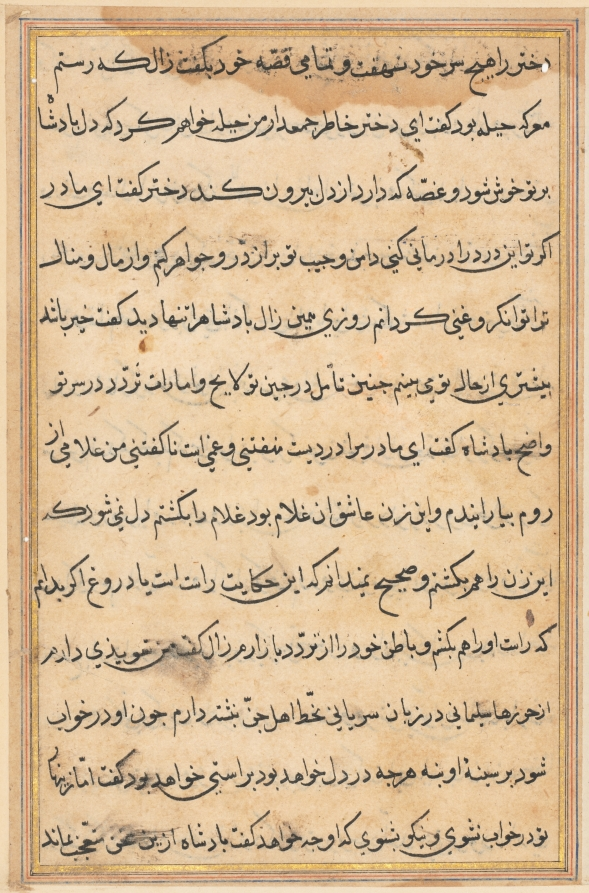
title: Page from Tales of a Parrot (Tuti-nama): text page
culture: Mughal India, court of Akbar (reigned 1556–1605)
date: c. 1560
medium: gum tempera, ink, and gold on paper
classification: Painting